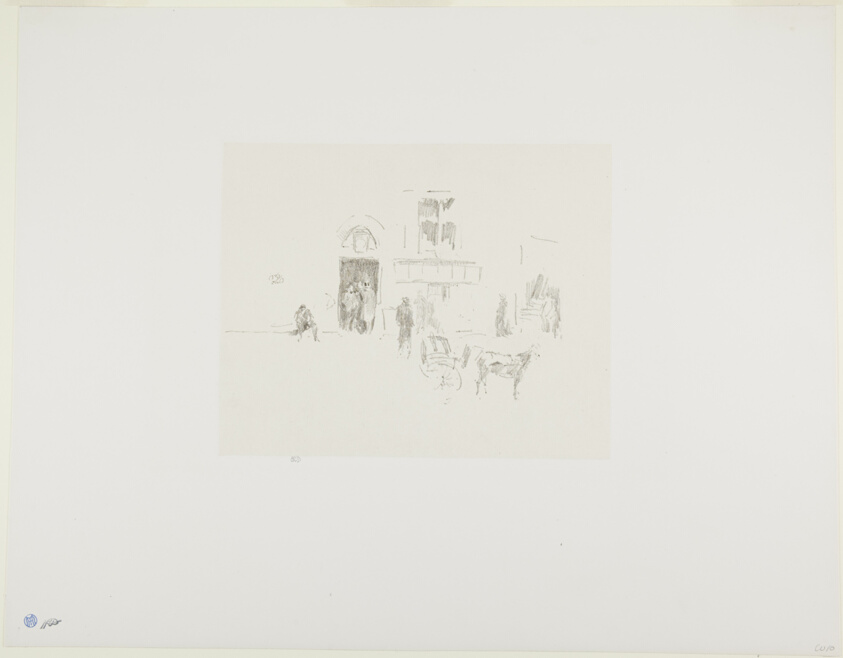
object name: Print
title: Gaiety Stage Door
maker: James McNeill Whistler (American, 1834-1903)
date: 1879, published 1887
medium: Transfer lithograph in black with scraping, on cream chine, laid down on off-white plate paper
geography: United States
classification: transfer lithograph; lithograph; print; prints and drawing; paper